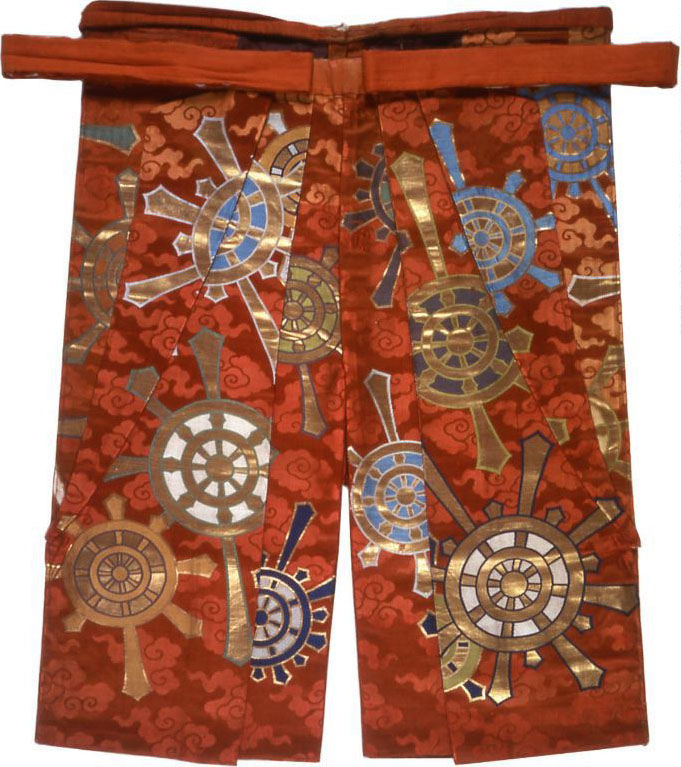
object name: Textile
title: Hangiri (Noh Costume)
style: meiji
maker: Japan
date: Meiji period (1868–1912), 1875/1900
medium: Silk and gold-leaf-paper strips, warp-float faced 7:1 satin weave with plain interlacing of secondary binding warps and supplementary patterning wefts; stiffening: reeds covered with paper, plain weave; lining: silk, plain weave; ties: silk over cotton, plain weave over plain weave; edges: couched with silk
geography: Japan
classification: textile; costume - weaving; costume